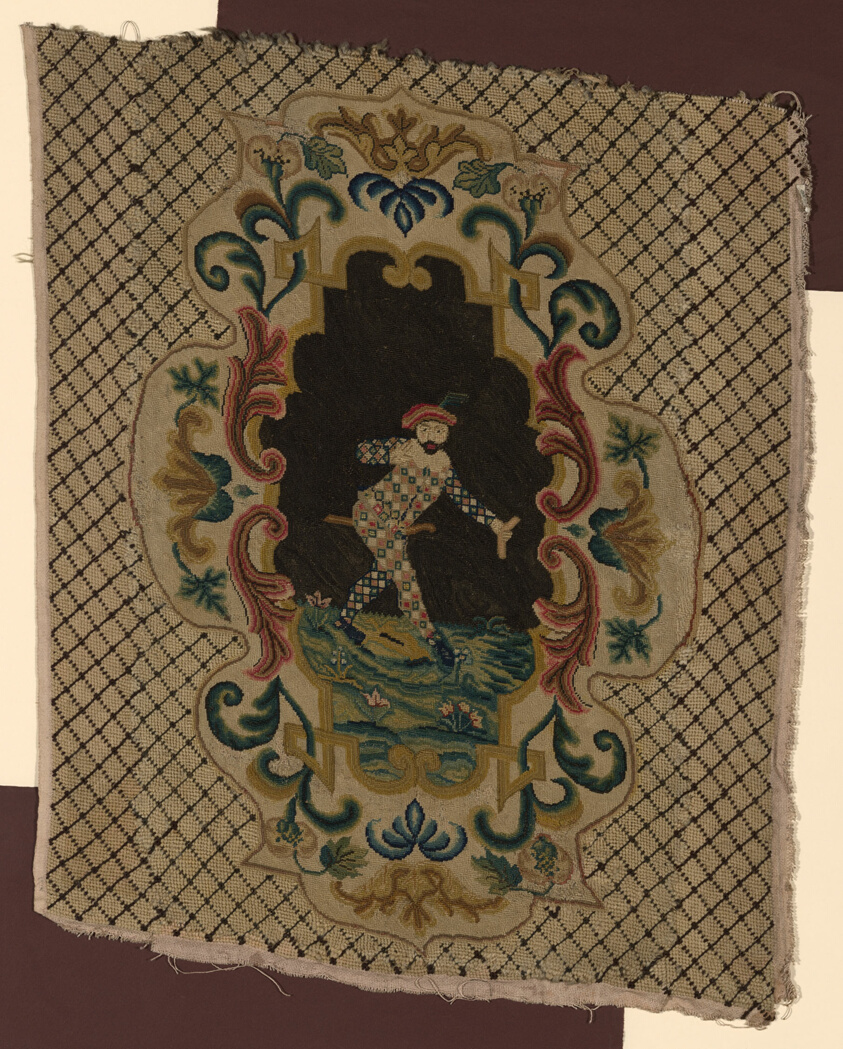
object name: Textile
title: Chair Seat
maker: France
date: 18th century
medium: Linen, plain weave; embroidered with wool yarns in tent, petit point and cross stitches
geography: France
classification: textile; needlework (visual works)